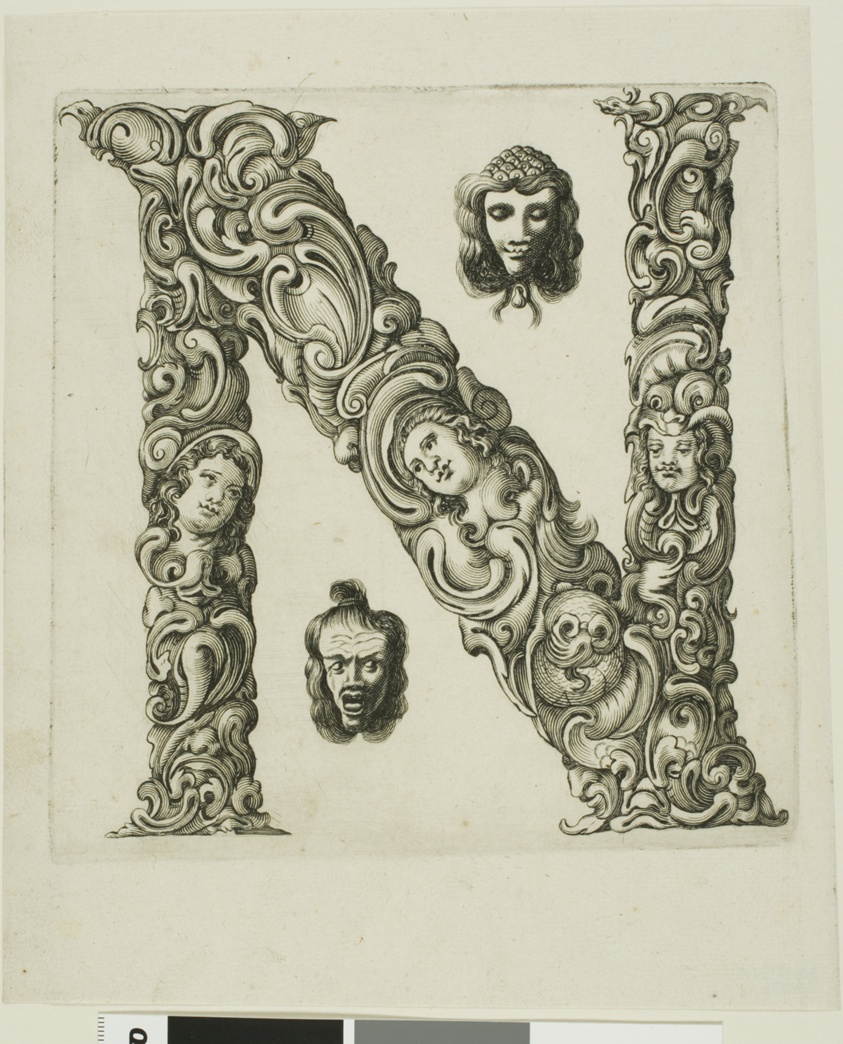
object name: Print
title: Letter N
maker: Peter Aubry (German, 1596-1668)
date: 1630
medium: Engraving on paper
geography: Germany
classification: engraving; print; prints and drawing